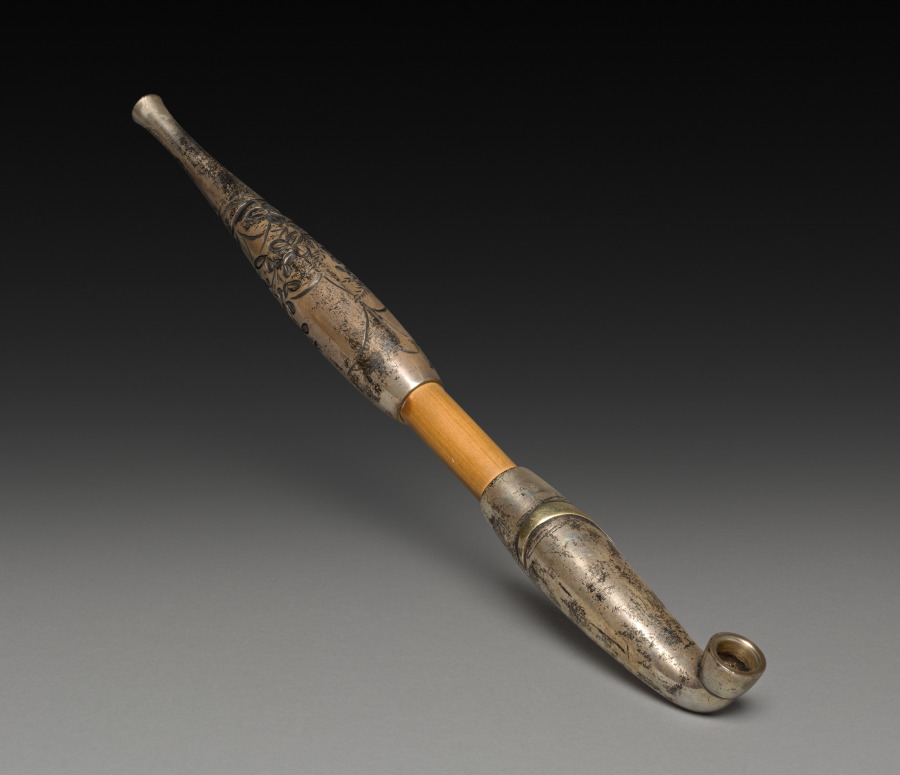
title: Tobacco Pipe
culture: Japan, Edo period (1615–1868)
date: early to mid-1800s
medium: bamboo, silver, and brass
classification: Miscellaneous